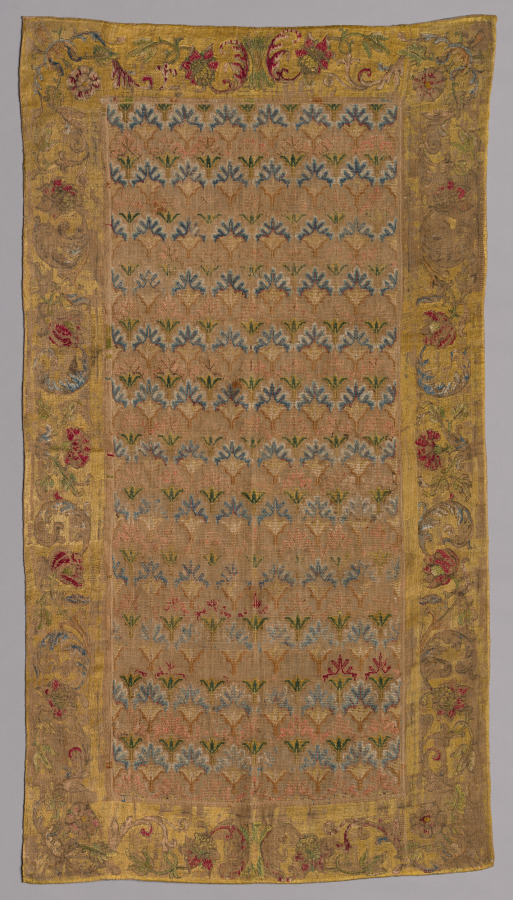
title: Embroidered Panel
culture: Italy, 17th century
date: 1600s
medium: embroidery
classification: Embroidery